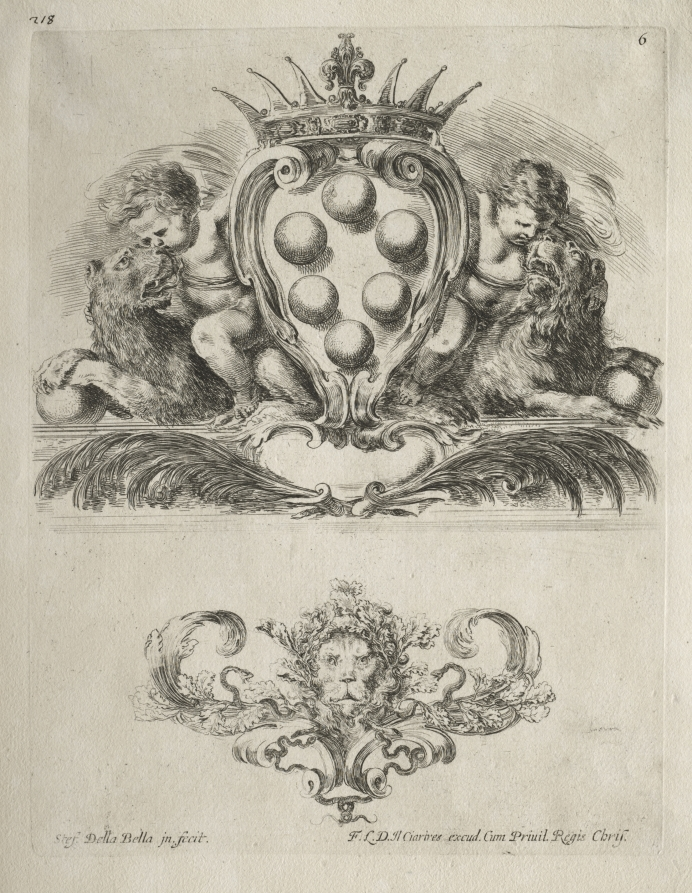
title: Collection of Various Caprices and New Designs of Cartouches and Ornaments: No. 6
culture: Italy, 17th century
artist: Stefano Della Bella (Italian, 1610–1664)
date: 1646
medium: etching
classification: Print